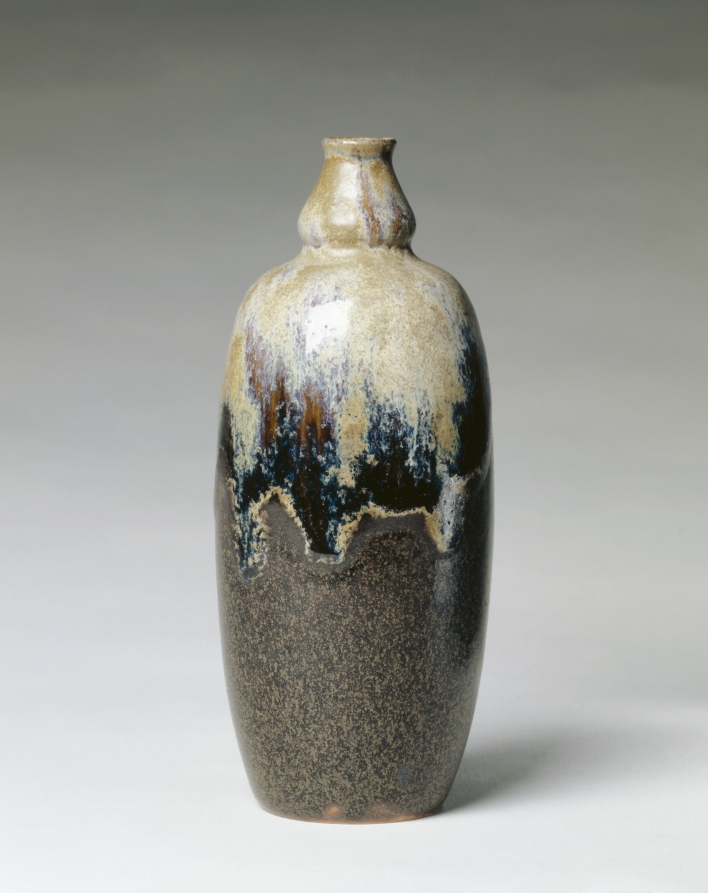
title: Vase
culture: France, early 20th Century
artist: Auguste Delaherche (French, 1857–1940)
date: c. 1910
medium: stoneware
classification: Ceramic